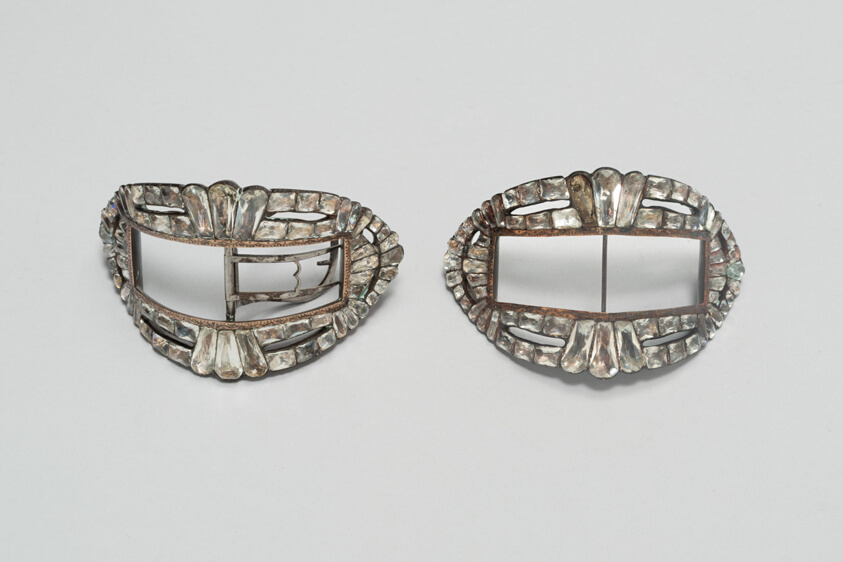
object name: Metalwork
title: Pair of Shoe Buckles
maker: London, England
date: Last quarter 18th century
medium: Silver, copper or gold, and paste jewels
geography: England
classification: buckle (strap accessory); costume accessory; european decorative arts; metalwork